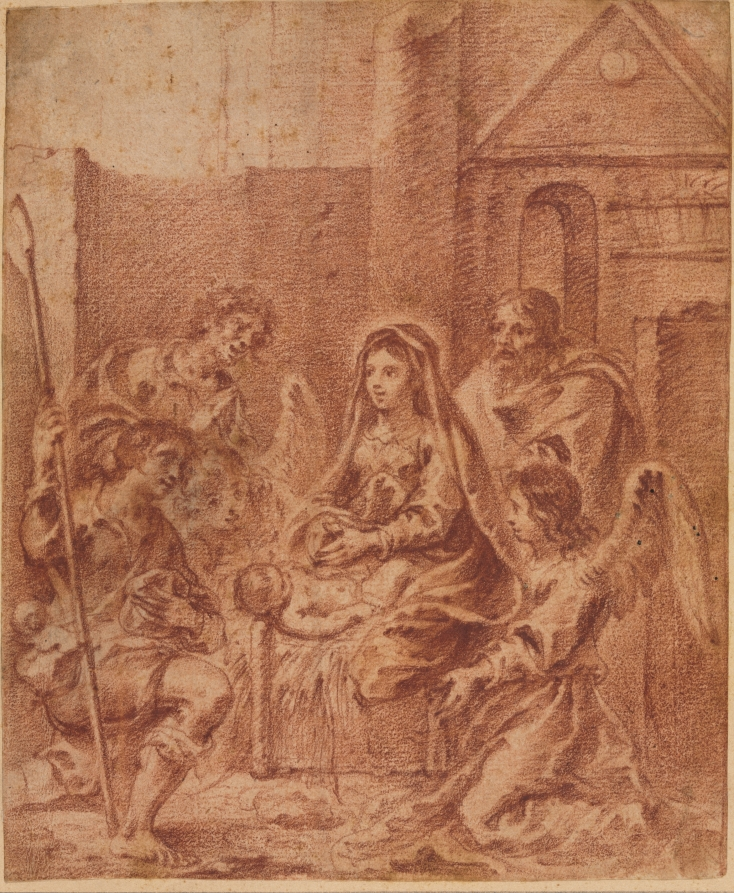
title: Adoration of the Shepherds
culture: France, 18th century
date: 1700s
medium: red chalk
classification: Drawing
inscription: SECONDARY SUPPORT, lower right, in graphite: Dutch ; lower right, in graphite: no good